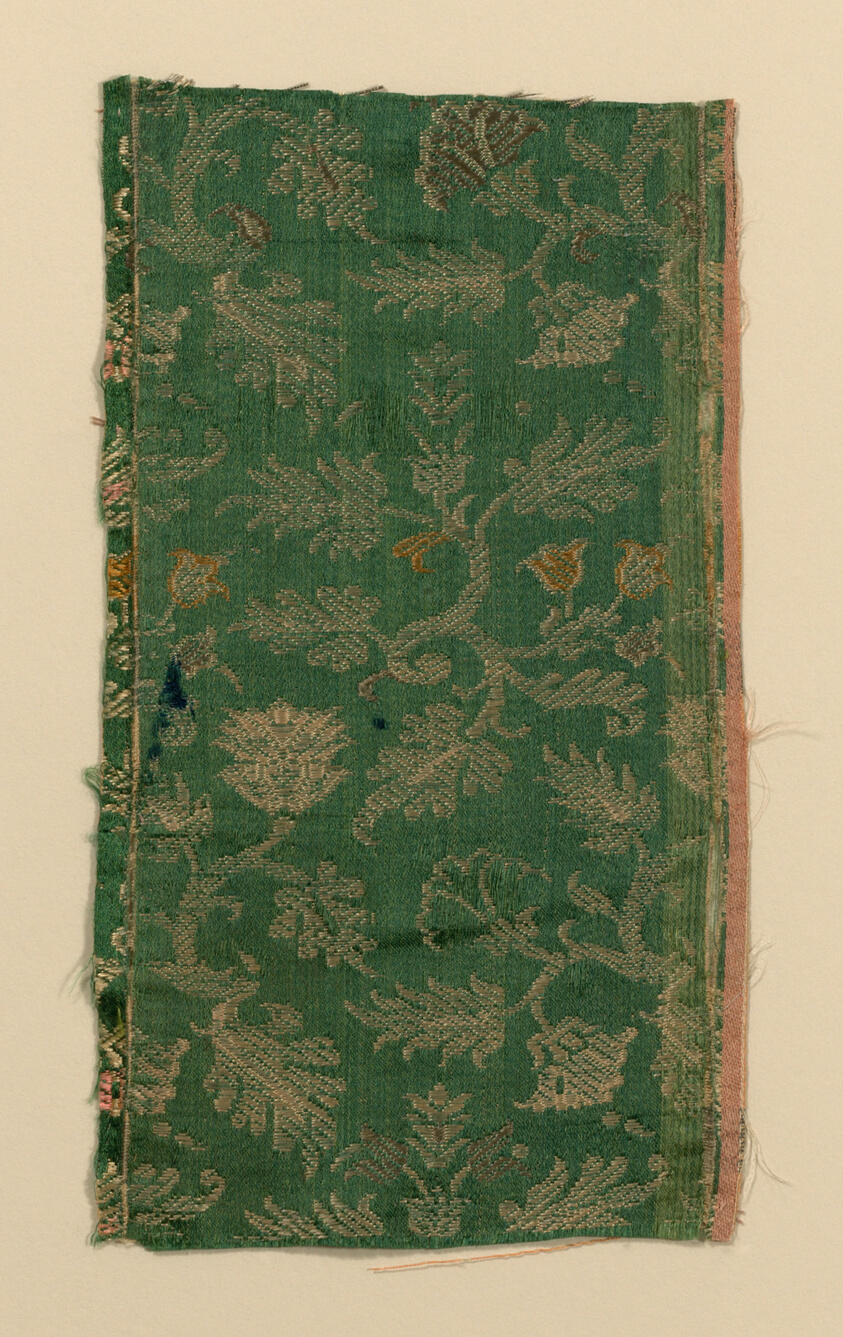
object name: Textile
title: Fragment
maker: Italy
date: 17th century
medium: silk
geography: Italy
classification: textile; weaving